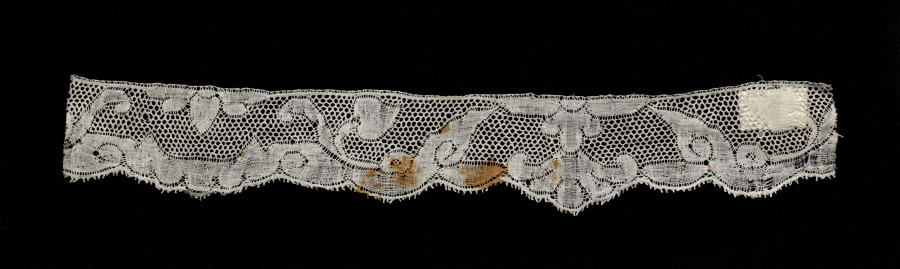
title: Lace Edging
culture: France, Valenciennes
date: 1700s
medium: Linen: bobbin lace (Valenciennes)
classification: Lace